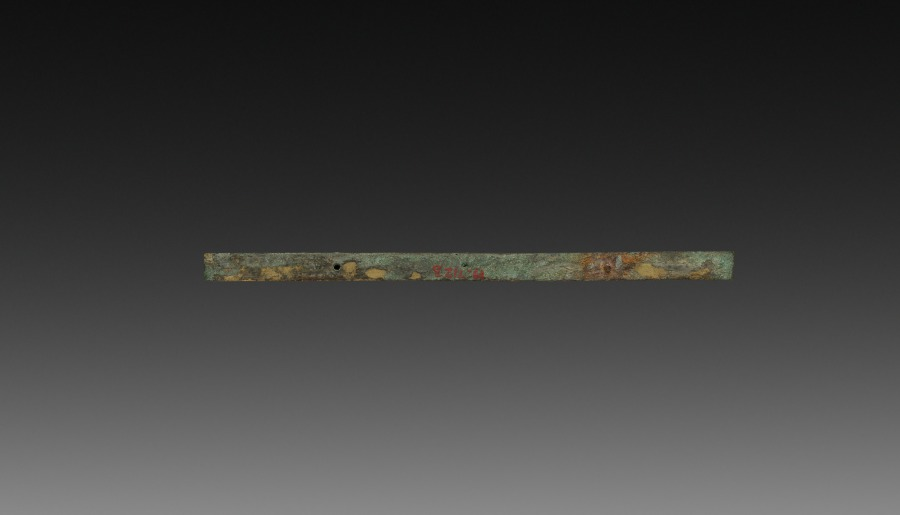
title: Ornamental Detail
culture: France, late 18th century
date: late 1700s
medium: gilt bronze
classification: Metalwork